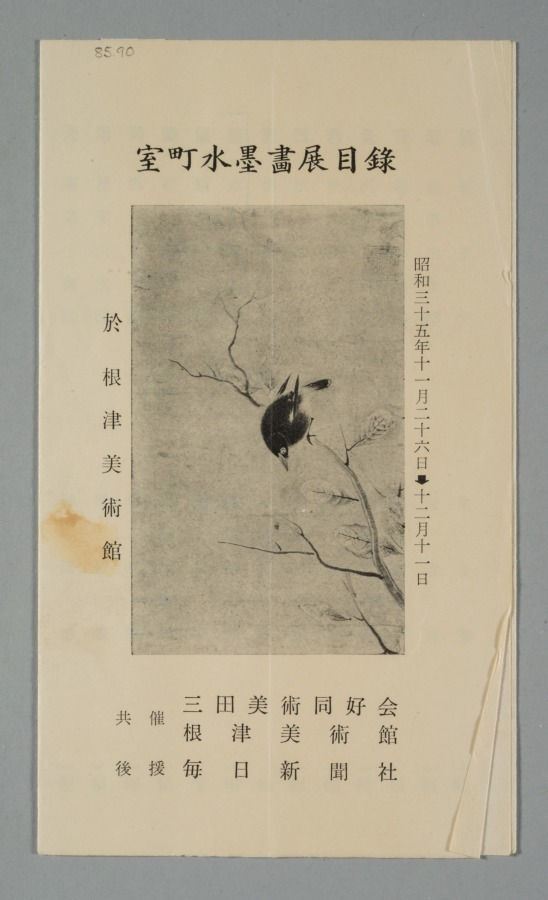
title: Wagtails and Narcissus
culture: Japan, Muromachi period (1392–1573)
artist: Eison (Japanese)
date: mid-1500s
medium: hanging scroll; ink on paper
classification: Painting